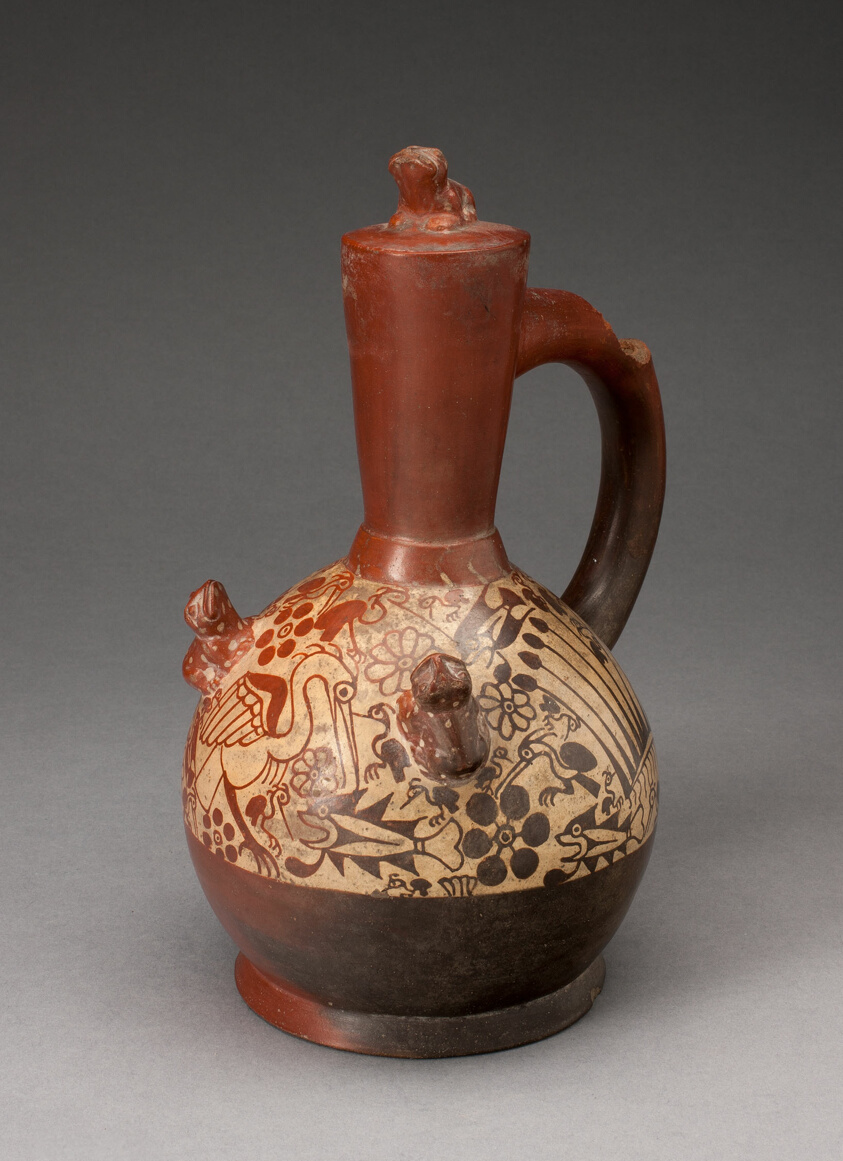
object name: Vessel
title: Stirrup-Spout Vessel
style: moche, mochica, early intermediate period, Pre-Columbian, americas, Arts of the Americas, andean, andes, south american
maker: Moche (North coast, Peru)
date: 100 BCE–500 CE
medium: Ceramic and pigment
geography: Peruvian North Coast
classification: earthenware; art of the americas; ceramics; vessel